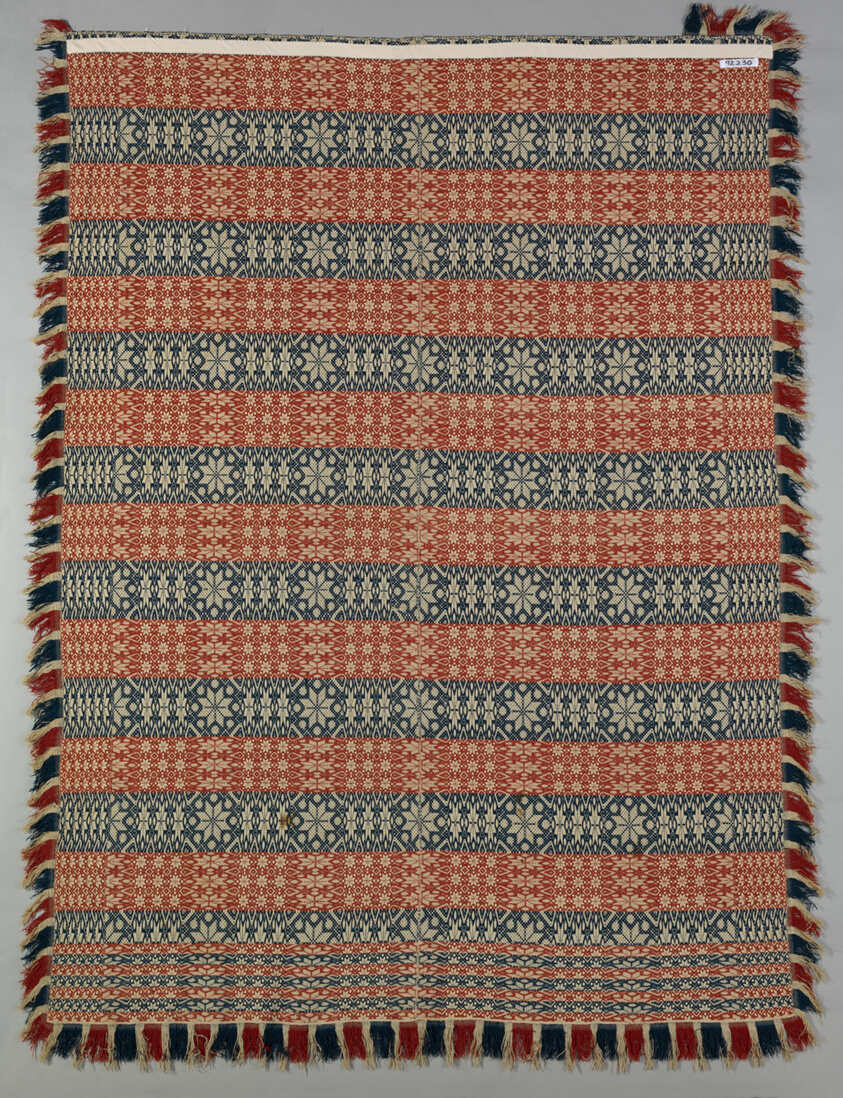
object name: Textile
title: Coverlet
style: American Fancy, Star work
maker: United States, Probably Pennsylvania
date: 1820-40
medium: Cotton and wool, composite point twill weave (star work, multiple shaft); two loom widths joined; with attached plain weave strip with weft fringe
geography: Pennsylvania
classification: weaving - coverlet; coverlet; weaving; textile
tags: stars, coverlet, geometric motif, circles, star work